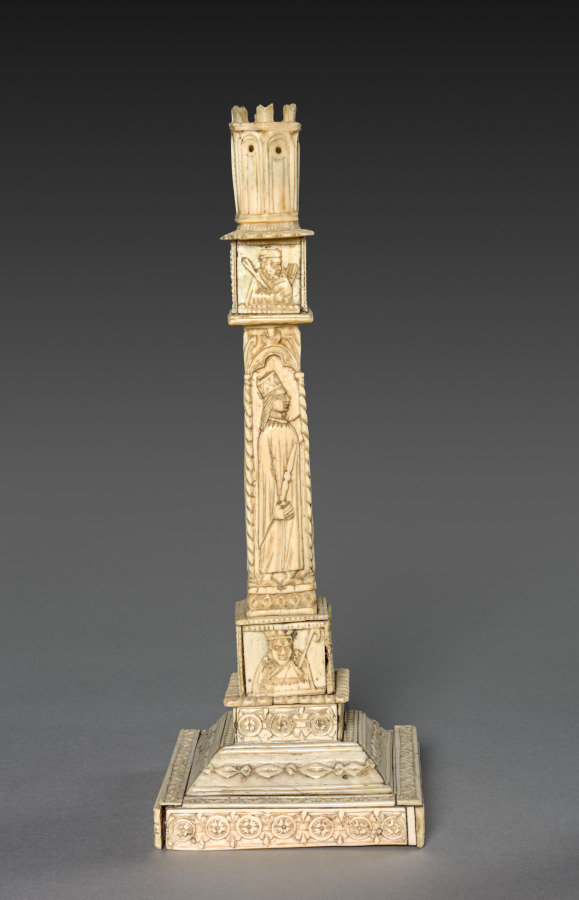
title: Candlestick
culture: Italy, 15th century style (possibly 19th-early 20th century)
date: 1800s - early 1900s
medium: ivory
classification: Ivory